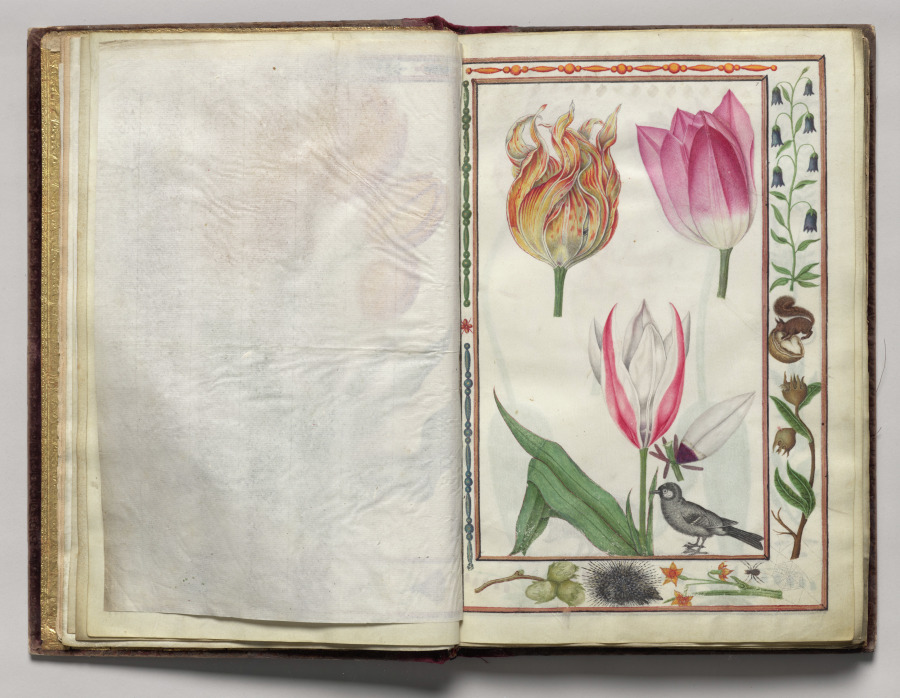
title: Tulipa Clusiana with Campanula, Porcupine, Spider, and Squirrel Border, folio 4 (recto), from Florilegium (A Book of Flower Studies)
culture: France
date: 1608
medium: watercolor, ink, silver, and gold over occasional traces of pencil, on vellum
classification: Bound Volume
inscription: Dated: Poitiers 1608 (on frontispiece) Signed: On frontispiece in black ink, lower right: Van Kuyk Notation on drawing: Frontispiece: in pencil, lower margin: * élève de Van Kessel, peintre flammand (* in pencil also appears in front of Van Kuyk's name).